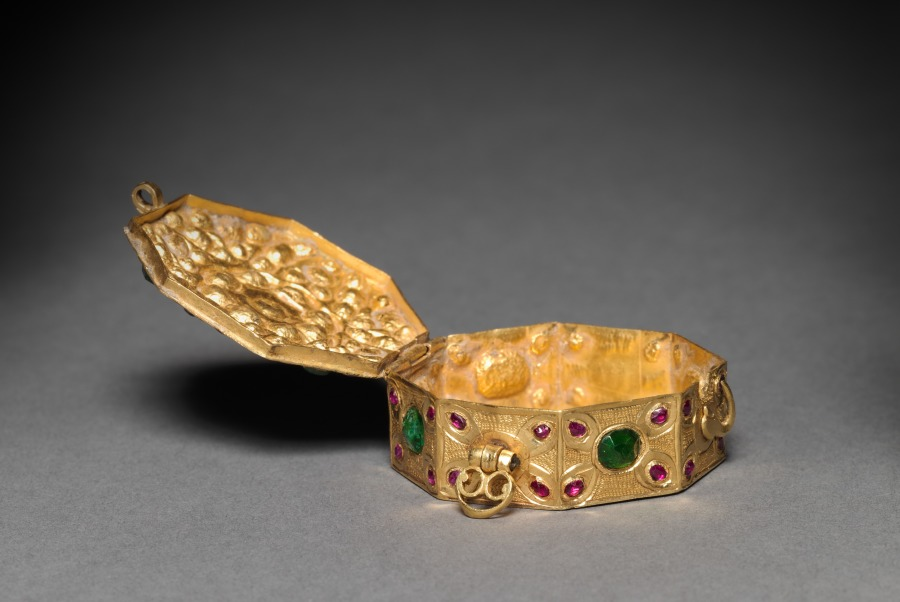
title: Octagonal Box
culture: India, 18th-19th century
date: 1700s-1800s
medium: gold paste and rubies, emeralds and diamonds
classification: Metalwork